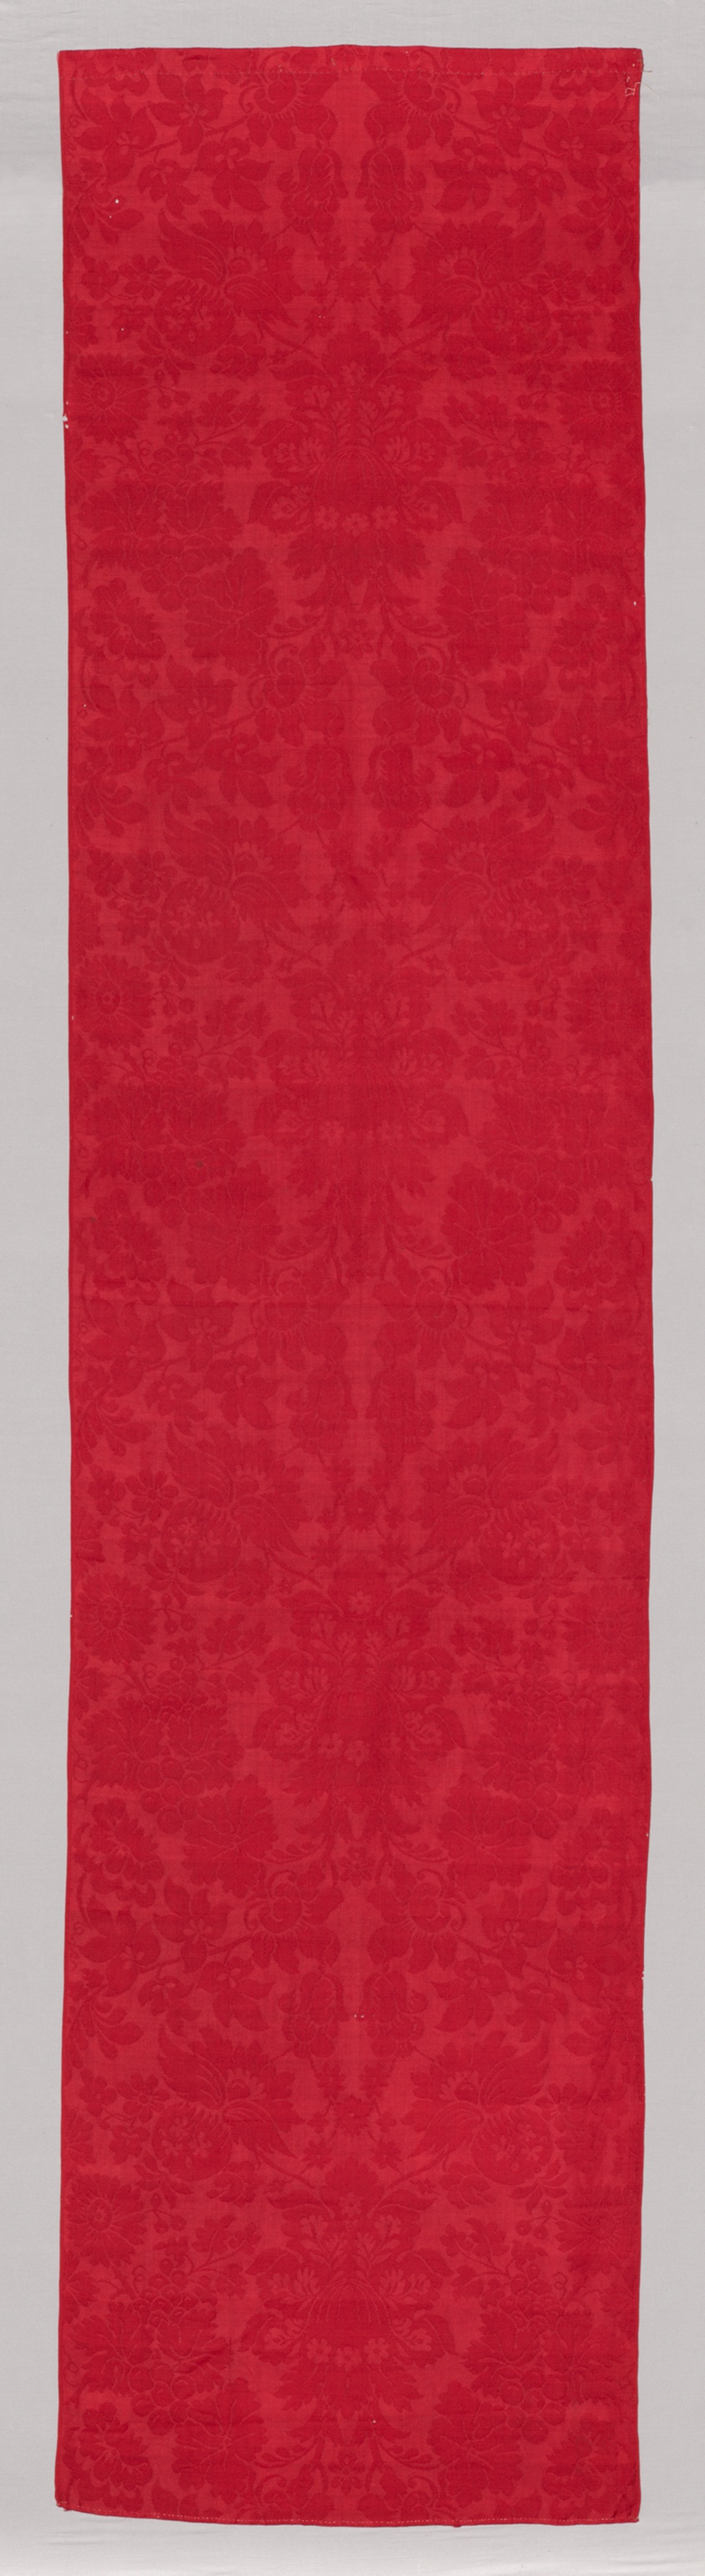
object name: Textile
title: Panel of Wool Furnishing Damask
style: 18th Century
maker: England, Norwich or Spitalfields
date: 1740-80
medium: Wool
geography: England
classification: weaving; textile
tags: floral motifs